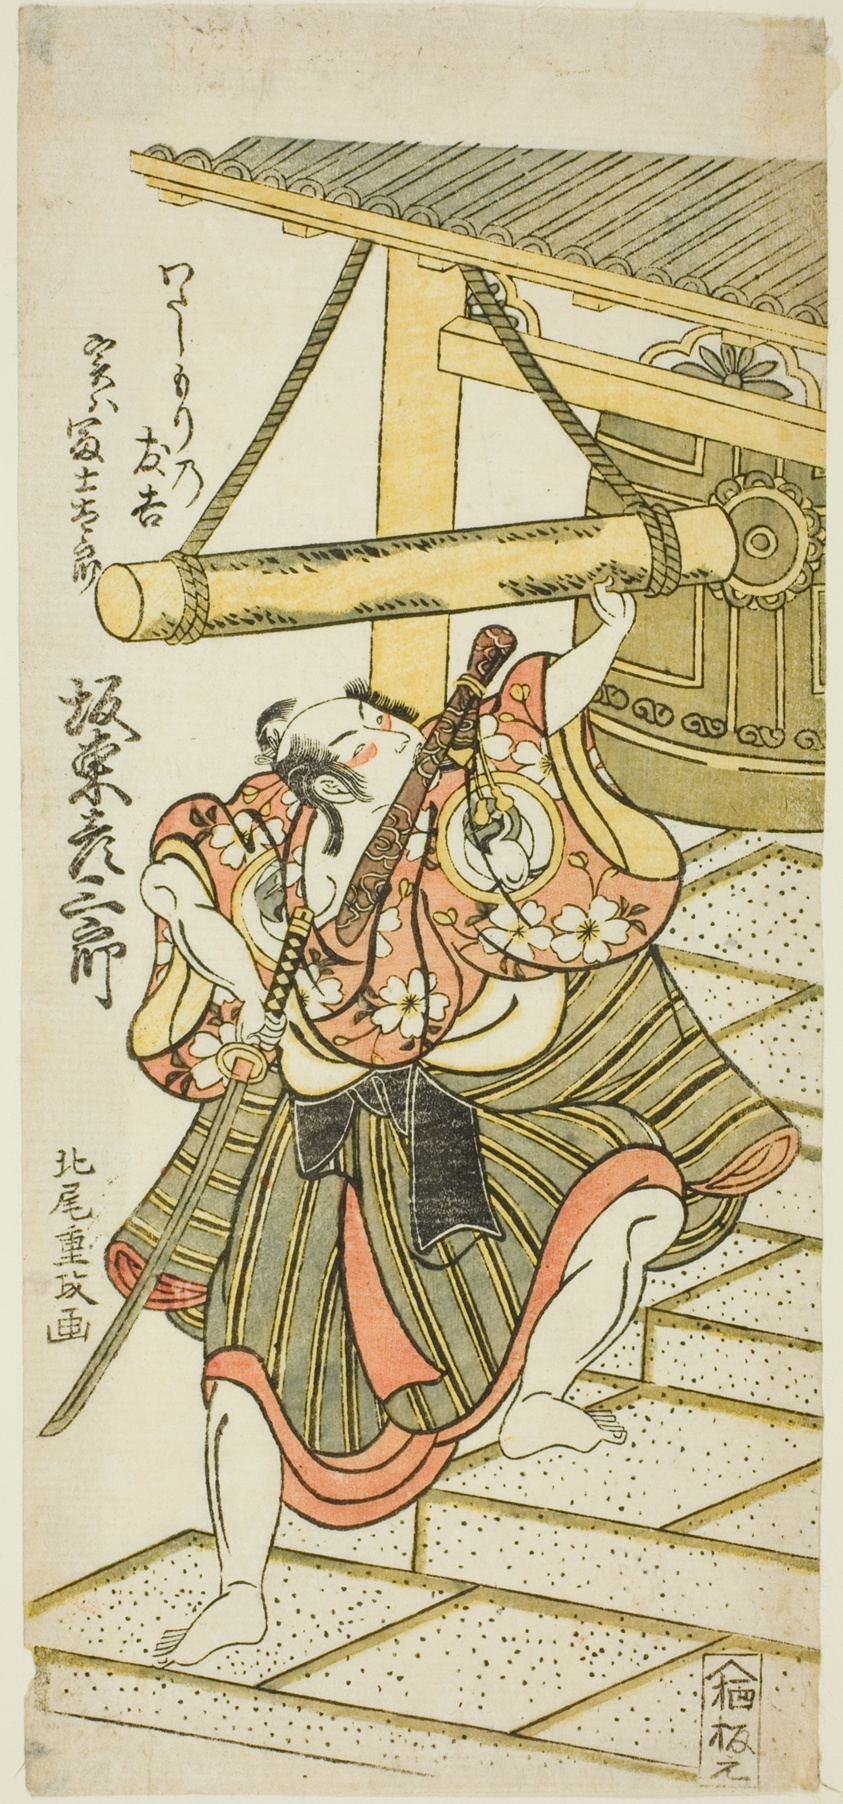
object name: Print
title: The Actor Bando Hikosaburo II as Fujitaro, disguised as the ferryman Tomokichi, in the play "Shomei Mugen no Kane," performed at the Nakamura Theater in the ninth month, 1767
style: Japanese (culture or style)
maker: Kitao Shigemasa (Japanese, 1739-1820)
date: 1767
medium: Color woodblock print; hosoban, benizuri-e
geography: Japan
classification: woodblock print; print; asian art